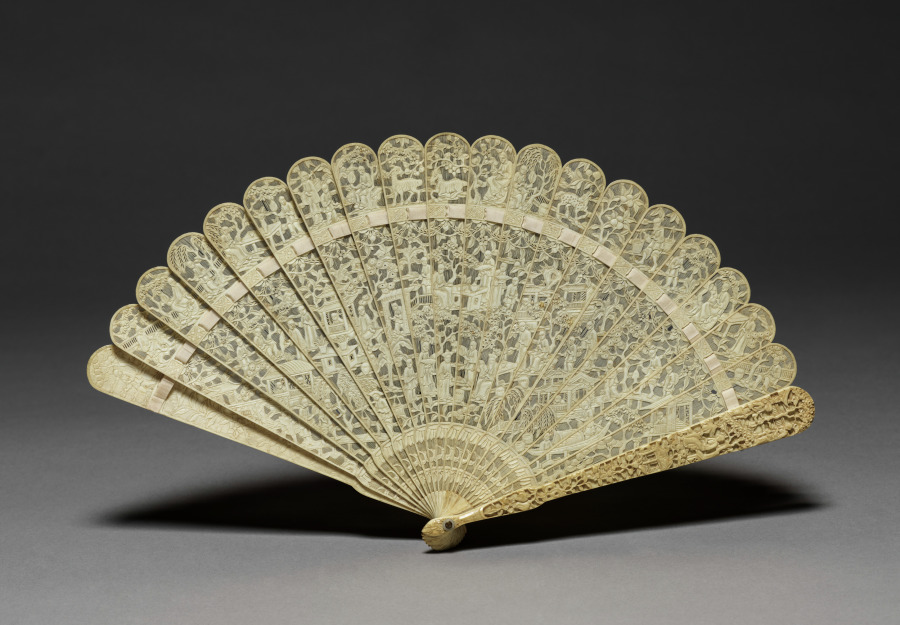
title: Fan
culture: China, 20th century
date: 1900s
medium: ivory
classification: Ivory